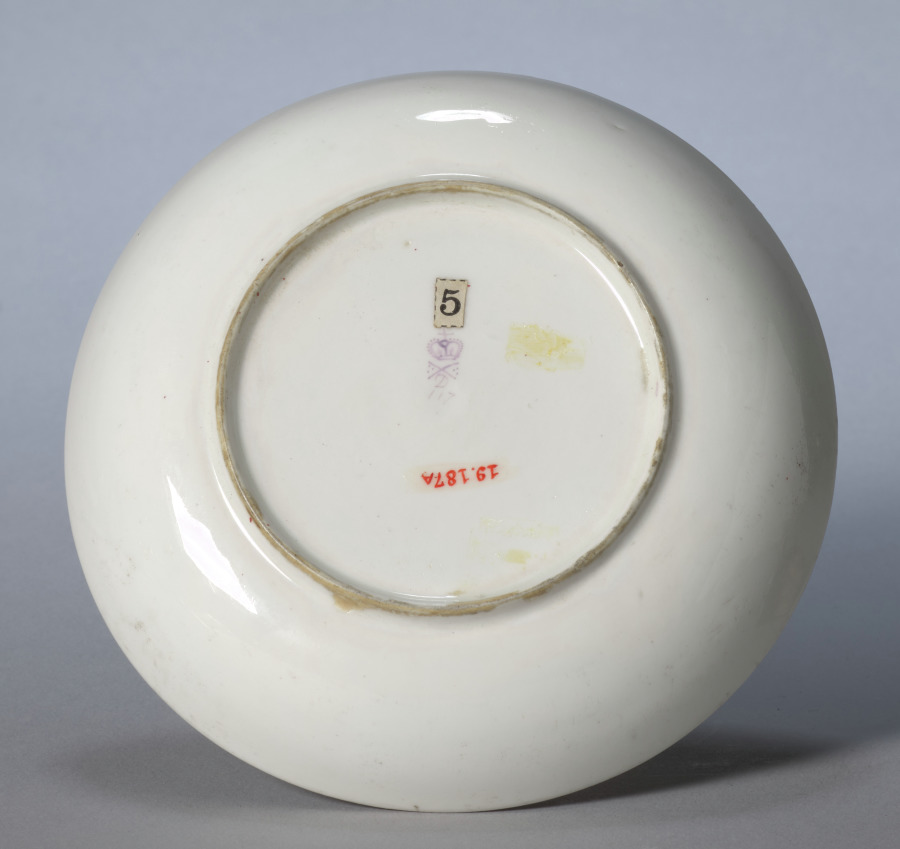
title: Saucer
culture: England, Derby, early 19th century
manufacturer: Derby (Crown Derby Period) (British)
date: c. 1800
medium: porcelain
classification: Ceramic